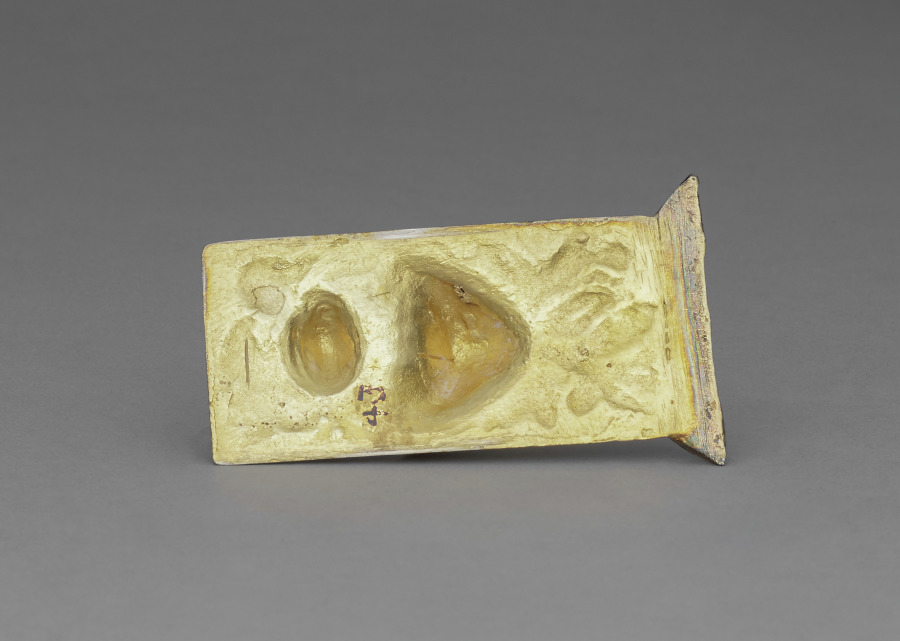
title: Tea Caddy (lid)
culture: England, London, 18th century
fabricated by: Paul Jacques de Lamerie (British, 1688–1751)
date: 1741–1742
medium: silver gilt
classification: Silver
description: In the 1600s and 1700s, silver played a significant role in projecting wealth, status, power, and ritual in British life. Tea was likewise a highly valued commodity, and as such, silver caddies were designed to display the social distinction of its owner. The prominently sloping shoulders of this lid's accompanying canister were designed by Paul Jacques de Lamerie in the early 1730s and became a standard form for tea caddies by the end of the decade.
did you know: This is the lid to a tea caddy. See cover record.